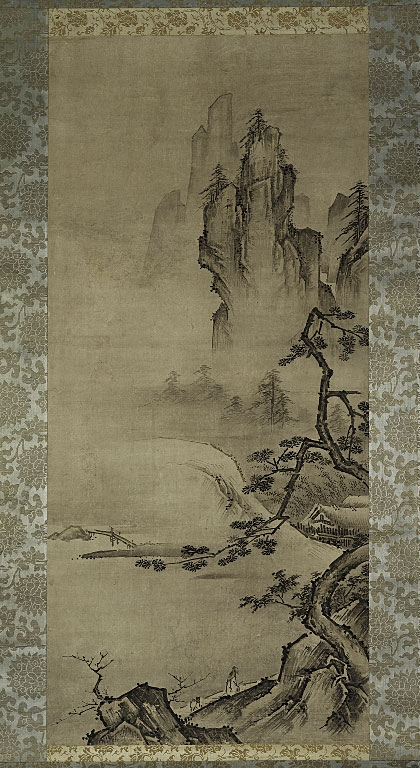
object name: Painting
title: Landscape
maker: Attributed to Oguri Sotan; Japanese, about 1413-1481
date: 16th century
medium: Hanging scroll; ink and color on paper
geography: Japan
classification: hanging scroll; painting; asian art